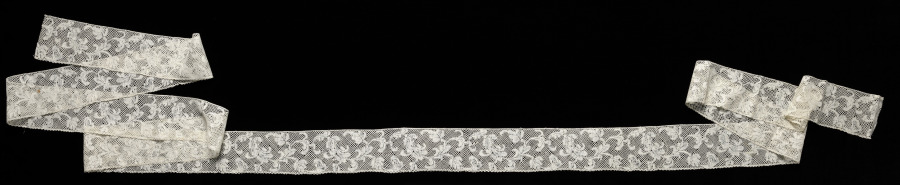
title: Lace Edging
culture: Italy, Milan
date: 1800s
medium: linen: bobbin lace with Flanders ground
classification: Lace